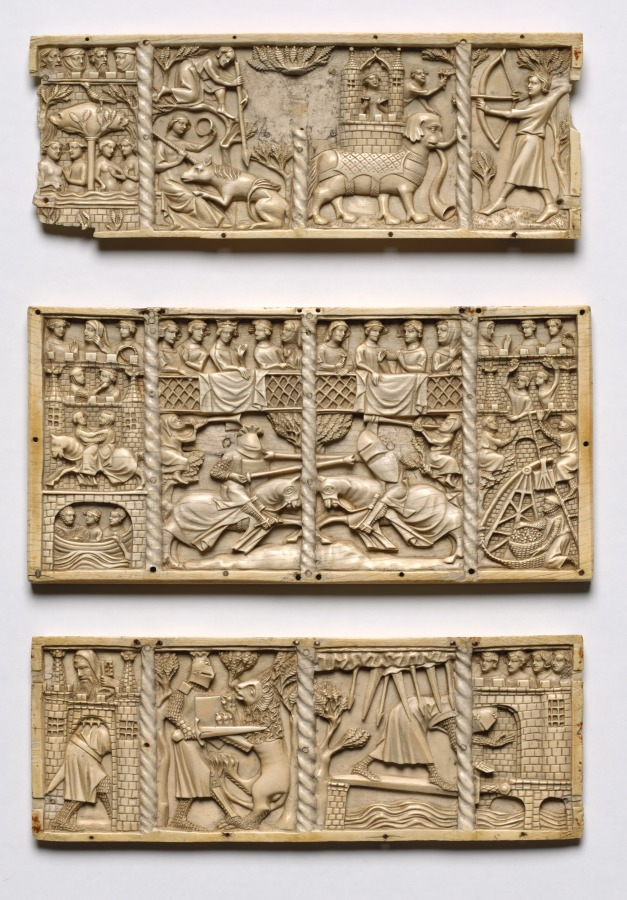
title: Set of Three Panels from a Casket with Scenes from Courtly Romances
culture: France, Lorraine?, Gothic period, 14th century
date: c. 1330–50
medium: ivory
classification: Ivory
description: Among the most lavish and deluxe products of French ivory workshops of the 1300s were large caskets carved with elaborate scenes drawn from courtly romances. The panels shown here come from such a casket. The largest panel (center) once formed the lid and depicts a tournament, the most splendid and romantic of knightly activities. Just to the right is a favorite allegory of chivalric love: knights assaulting the castle of love. The two side panels depict other scenes such as the fountain of youth, Sir Gawain and the Lion, and Lancelot crossing the sword bridge. These images suggesting chivalry, fertility, virginity, youth, and an idealized courtly love likely derive from manuscripts including the Roman de la Rose and the poems of Chrétien de Troyes. Such texts were often found within the libraries of the aristocracy, so the casket’s symbolic images would have been readily understood. Such caskets may have originally been gifts between a man and a woman. The expense of the material, ivory, suggests they were produced for an elite, aristocratic clientele.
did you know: In the center panel two knights in mail surcoats and helms joust here with blunted lances "for courtesy," a version of the joust known as the Joust of Peace.